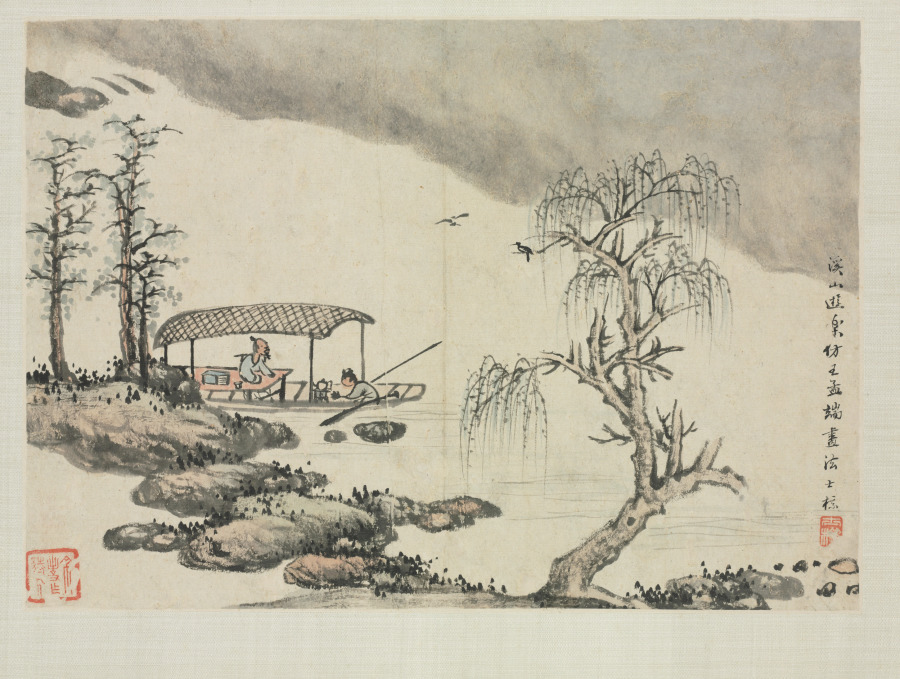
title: Landscape Album in Various Styles: Pleasure in a Mountain Brook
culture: China, Qing dynasty (1644-1911)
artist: Zha Shibiao (Chinese, 1615–1698)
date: 1684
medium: album leaf, ink and light color on paper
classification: Painting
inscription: Artist's inscription, signature, and seal: Pleasure in a mountain brook, in the manner of Wang Mengduan [Wang Fu]. Shibiao. [seal] Shibiao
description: Zha Shibiao, a native of Anhui province, moved to Yangzhou later in his career, like so many of his fellow countrymen. At age 68, he painted this album with seasonal landscapes in various styles. Painted in fresh colors and wet strokes, all depict typical scenes of Jiangnan, the Yangzi delta: a herdboy on a buffalo wading through water, boating on the stream to the Peach Blossom Spring at Wulin, a waterfront town shrouded in mist, a scholar on his donkey enjoying the red autumn leaves, and drinking tea on a boat while watching migrating birds.